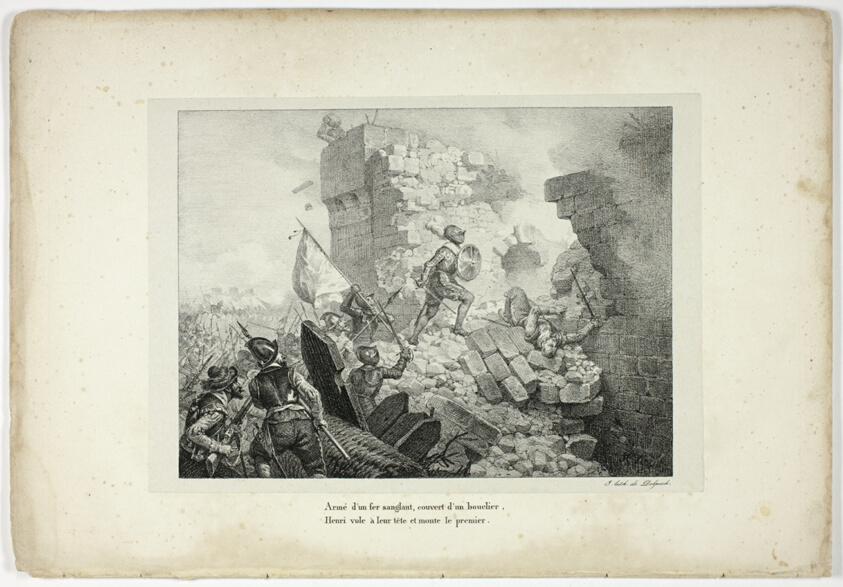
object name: Print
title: Armé d'un fer sanglant, couvert d'un bouclier...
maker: Horace Vernet (French, 1789-1863); poem by Voltaire (French, 1694-1778); printed by Francois Seraphin Delpech (French, 1778-1825); published by Dubois (French, 18th-19th century)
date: 1825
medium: Lithograph in black on gray chine, laid down on ivory wove paper (chine collé)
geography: France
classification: lithograph; print; prints and drawing